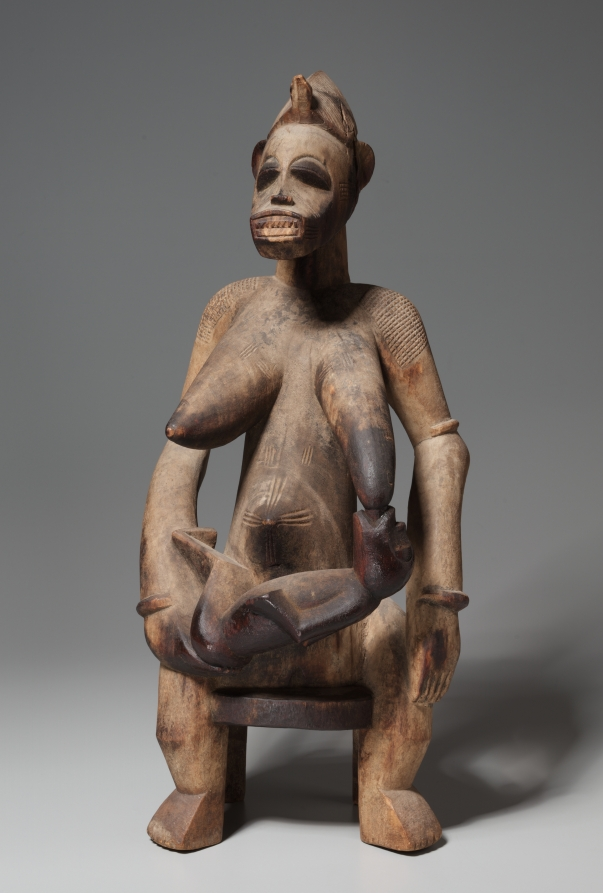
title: Nursing Woman with Child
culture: Africa, West Africa, Côte d'Ivoire, reportedly Korhogo area, Senufo-style carver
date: 1800s-1900s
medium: Wood and organic material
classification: Sculpture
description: Beyond its specific depiction of a mother nursing her child, this sculpture symbolizes a larger concept of ancestral motherhood that is central to Senufo society, in which cultural inheritance is matrilineal. The darkened areas of wood come from oils applied to its surface as both libations and surface protectants. In some Senufo beliefs, one of the most important founding ancestors is the Great Mother or Ancient Woman (Katyeleeo or Maleeo). In groups that believe in the Great Mother, she suckles male initiates with the "milk of knowledge." Through this process, youths gain the information they need to become adults (that is, fully human). The simplified appearance of the "child" in this sculpture reflects his unformed, pre-initiated state.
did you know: The mother’s face, adorned with incisions and markings, resembles that of women who have reached puberty.